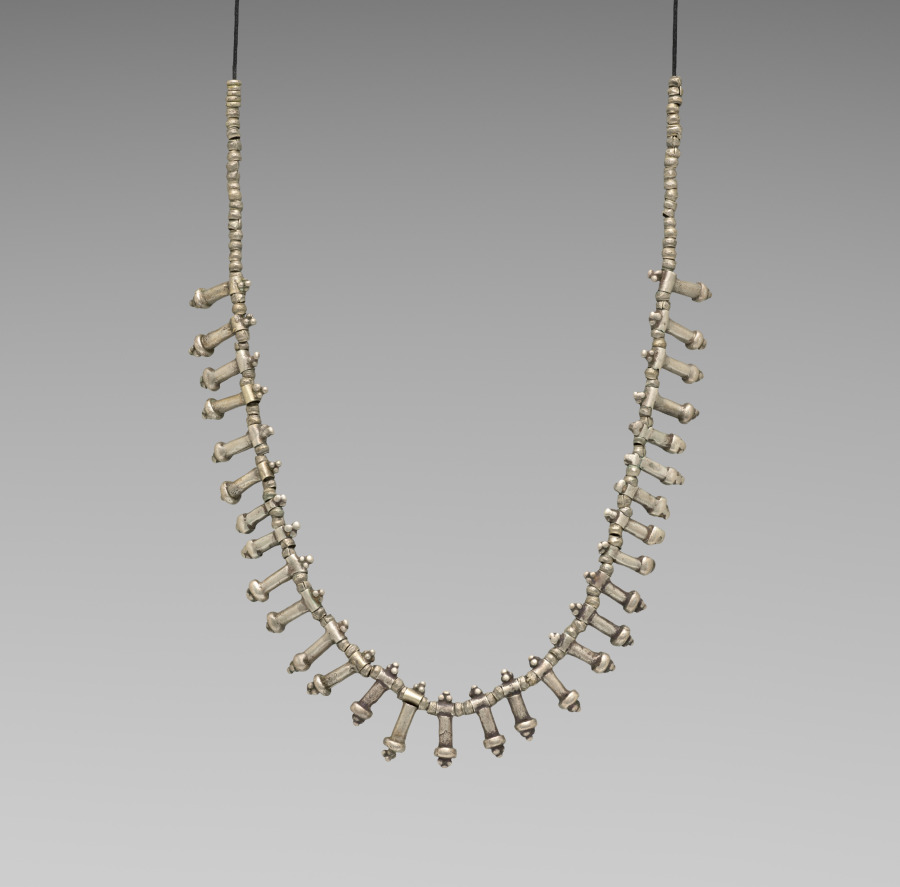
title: Necklace with beads (sadi?)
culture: Africa, East Africa, Ethiopia, unknown silversmith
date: late 1800s or early 1900s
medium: silver alloy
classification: Jewelry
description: This necklace has an abundance of phallic beads representing fertility framed by dozens of smaller silver beads. Specialists in gold and silver would melt silver into small balls that were then attached to drawn rods of metal. Atop each bead is a pile of small granulations; these tiny metal spheres are small like pieces of grain.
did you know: There are no local sources of silver in Ethiopia.